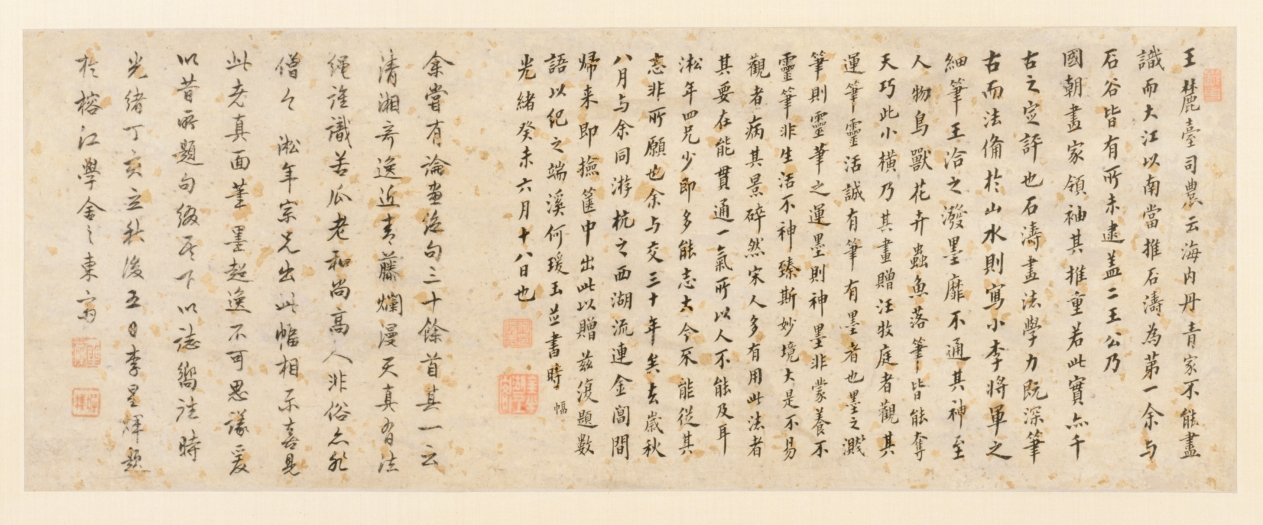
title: Spring Mist over Jiangnan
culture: China, Qing dynasty (1644-1911)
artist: Shitao (Chinese, 1642–1707)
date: 1697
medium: Hanging scroll; ink and light color on paper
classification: Painting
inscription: 揚子橋邊江水泛，柳絲弄色不管人白頭。/ 一春雨雪阻遊屐，梅花尚可清明留。/ 老去無聊藉朋輩，年來星散隨波鷗。/ 汪子無端向我發長嘯，吾將縱覧閩澥之奧妙。/ 請君置我先向畫圖看，眼前丘壑都一掃。/ 千里萬里毫端見，非墨非煙聊寄傲。/ 君家嚴親百代才，一言奏對驚風雷。/ 天子非常賜顏色，灜台稱旨今南來。/ 多少寒灰待君活，看君作意為龍媒。 丁丑春題畫，贈汪子牧庭之閩海。兼呈思白學使。清湘老人濟大滌堂下。[印]原濟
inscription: 2 colophons and 7 additional seals: 1 colophon and 4 seals of He Yuanyu 何瑗玉 (1840-?); 1 colophon and 2 seals of Li Xinhui (19th-20th c.); 1 seal unidentified.